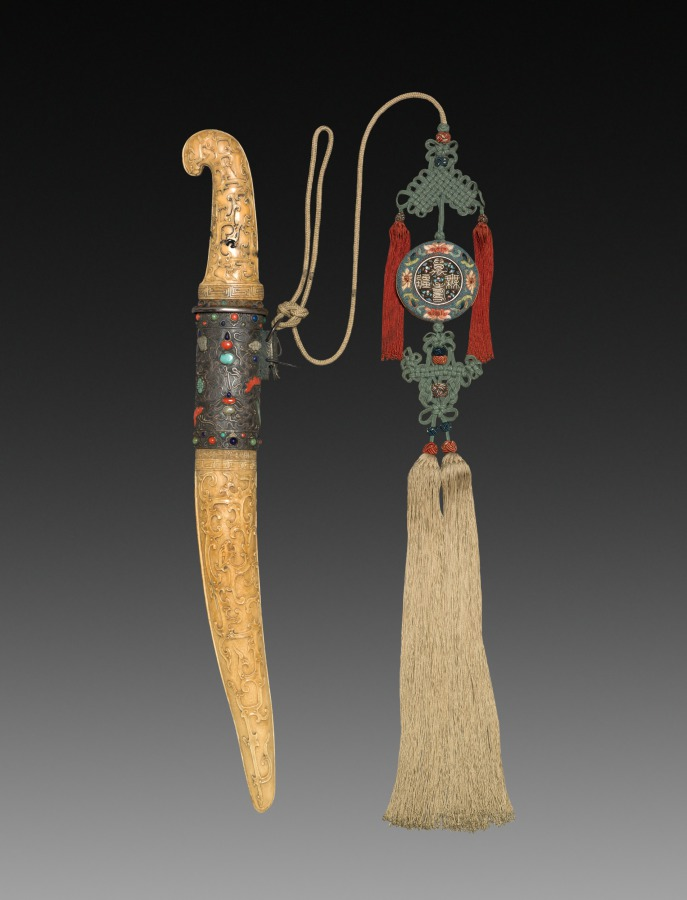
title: Small Sword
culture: China, Qing dynasty (1644-1911)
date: 1800–1911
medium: metal blade, ivory handle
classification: Arms and Armor